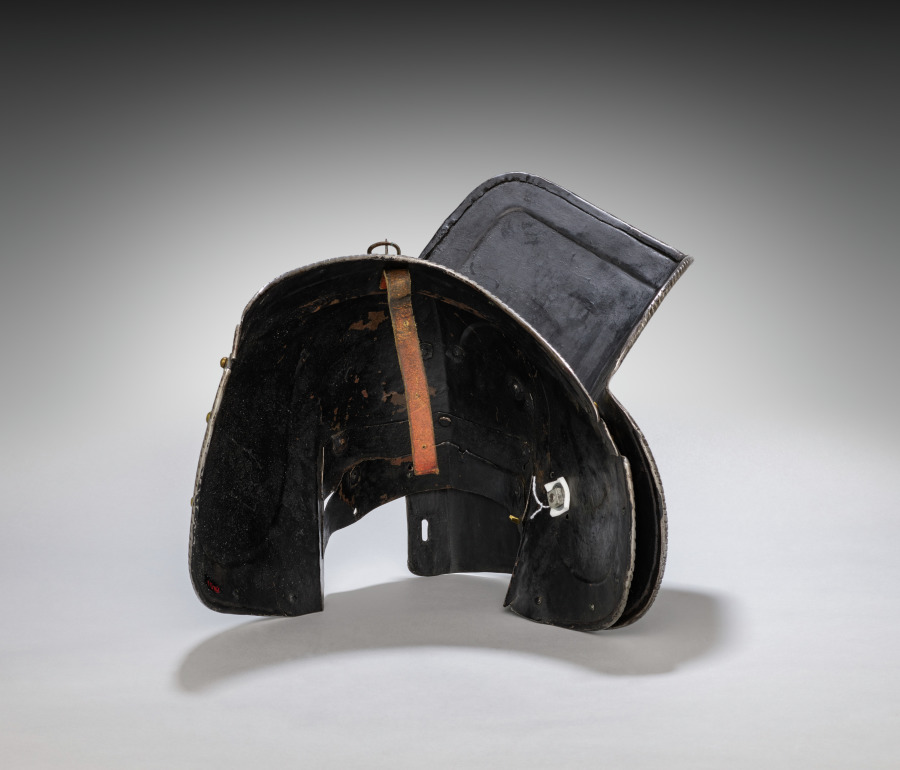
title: Pauldron (proper left) and Grandguard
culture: South Germany, 16th century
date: c. 1560–1580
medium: steel, leather straps, brass rivets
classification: Arms and Armor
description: This armor was developed for the joust--a sporting combat between two mounted contestants. Although all of the elements of this armor date from the same period, they are not all from the same suit. This armor is thus called "composed." It also shows the asymmetry of jousting armor. The participants rode along a wall-like barrier known as a "tilt" with their left sides facing one another. Consequently, armor on that side of the body had to be thicker. Note the large plate (grandguard) over the left shoulder for extra protection. Also, the breathing holes in the helmet were placed on the right side (farthest from an opponent's lance) to avoid injuries from splinters. The bracket attached to the right breastplate is called the lance-rest, a shock-absorbing support designed to accommodate the lance when "couched" under the right armpit.